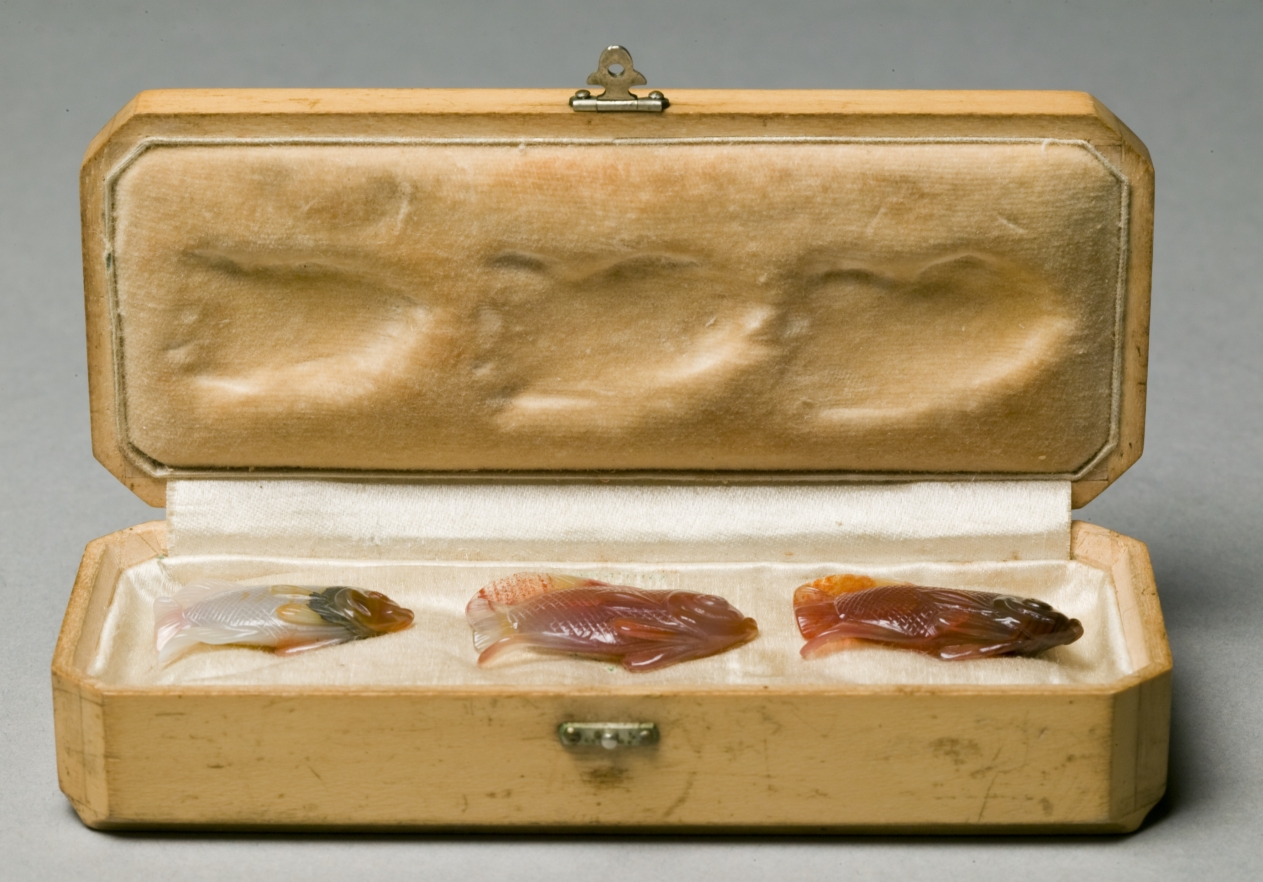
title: Set of Three Fish in Original Box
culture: Russia, St. Petersburg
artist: House of Fabergé (Russian, 1842–1918)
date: c. 1890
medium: agate, holly, silk velvet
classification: Miscellaneous